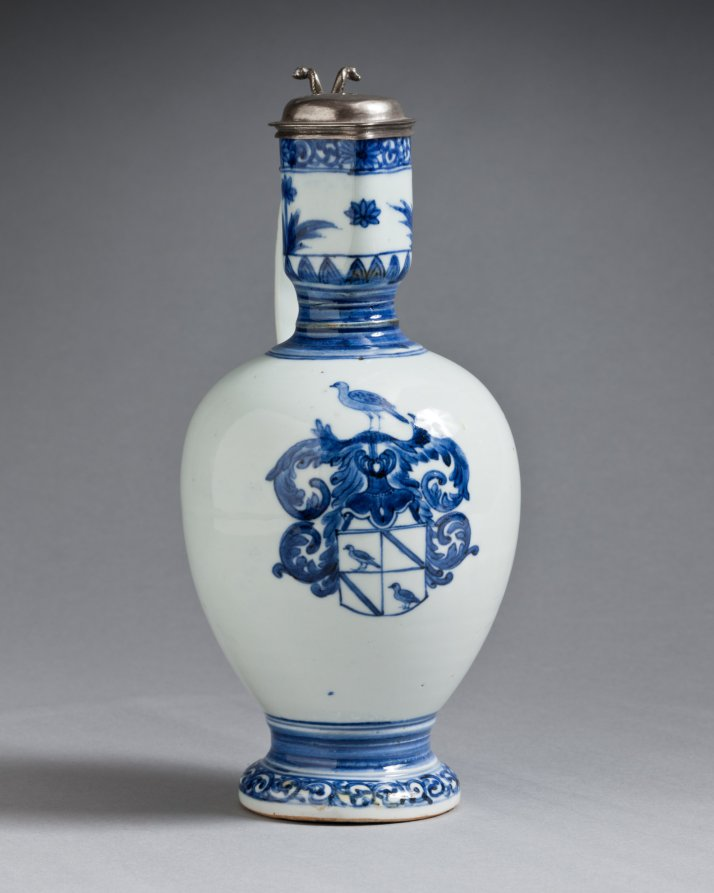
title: Jug with Silver Mounts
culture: Japan, Edo period (1615–1868)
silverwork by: Barent van Leeuwen (Dutch, 1637–1682)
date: c. 1662–76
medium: porcelain with underglaze blue decoration and silver mounts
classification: Ceramic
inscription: [on silver]: town mark for Amsterdam; lion rampant crowned (alloy mark for 0-934 silver); d (date letter for 1666), maker's mark of Barent van Leeuwen.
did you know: The coat of arms on this jug are those of the Valckenier family, active in the Dutch East India Company.